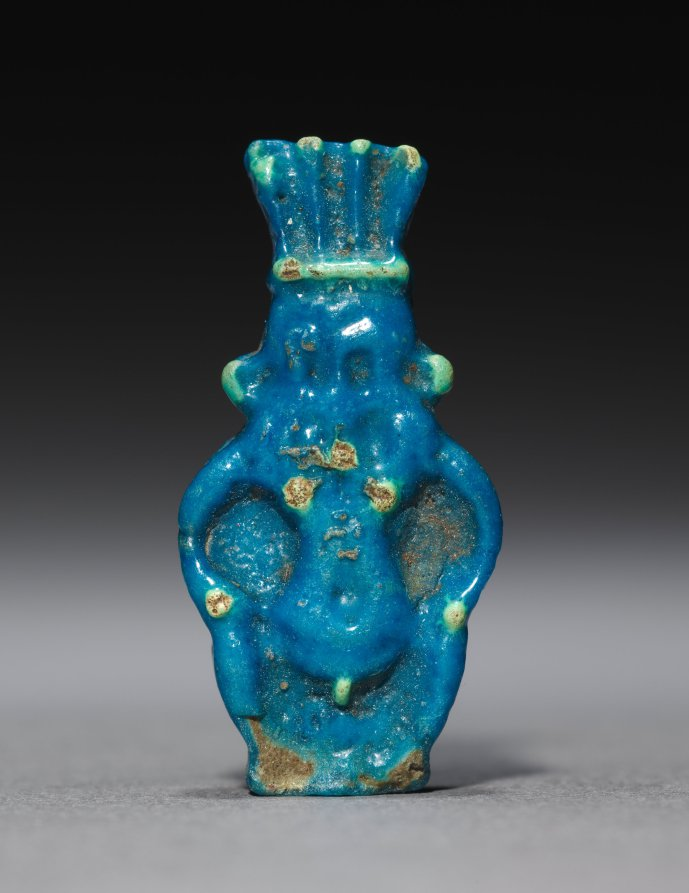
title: Amulet of Bes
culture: Egypt, Greco-Roman period (332 BCE–395 CE), Roman empire (30 BCE–395 CE)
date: 30 BCE–395 CE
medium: polychrome faience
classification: Amulets